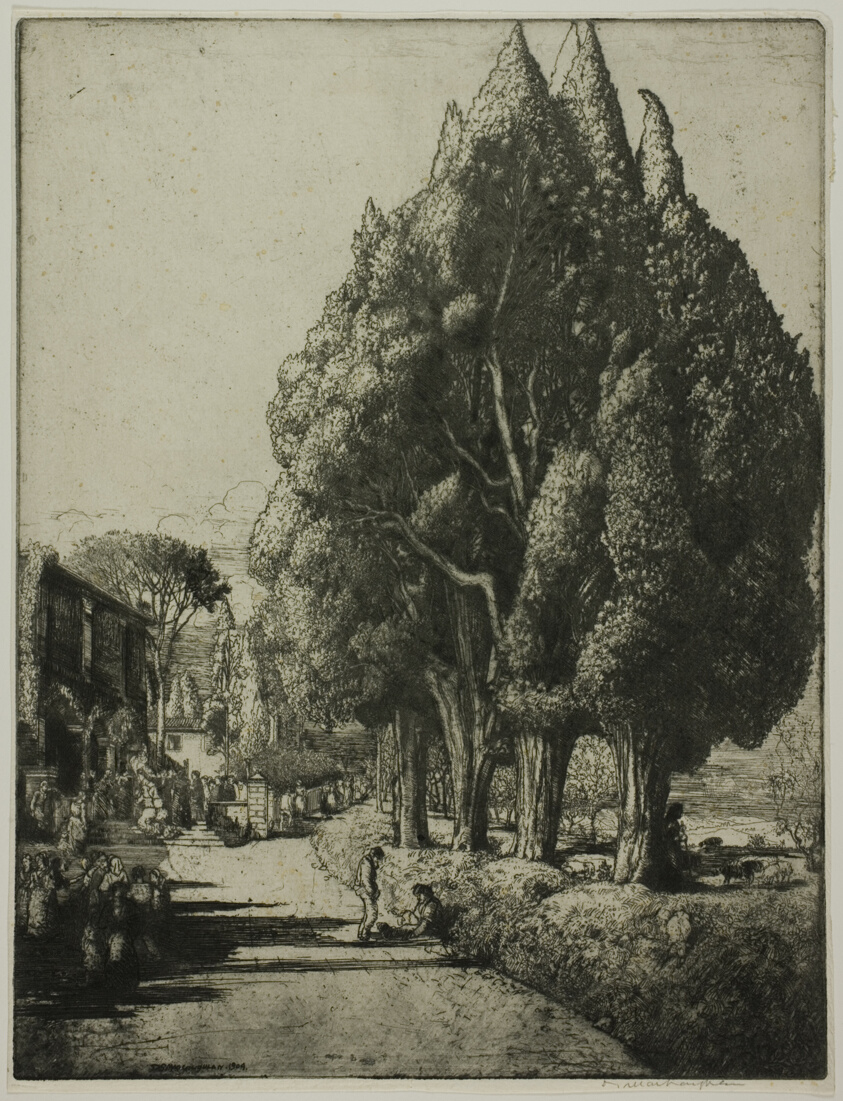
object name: Print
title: The Cypress Grove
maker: Donald Shaw MacLaughlan (American, born Canada, 1876-1938)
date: 1904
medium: Etching in black on ivory laid paper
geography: United States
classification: etching; print; prints and drawing